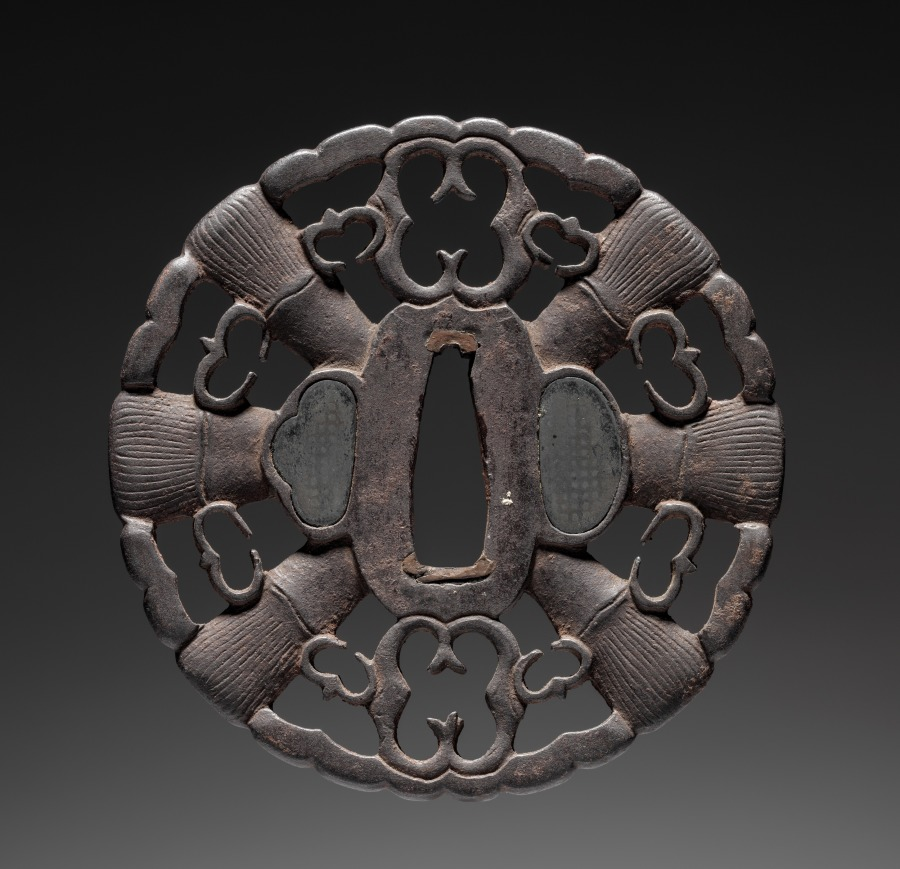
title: Sword Guard (Tsuba)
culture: Japan, possibly Edo period (1615-1868)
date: c. 1615–1868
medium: iron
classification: Arms and Armor